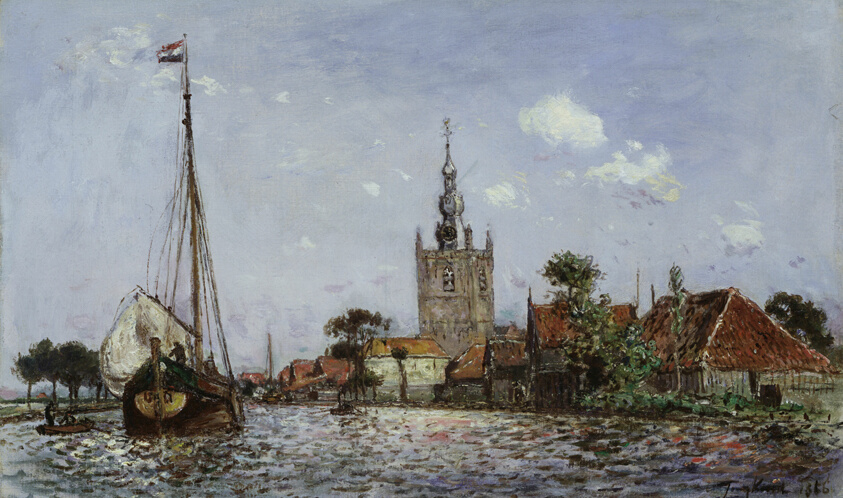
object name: Painting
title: The Church of Overschie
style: Impressionism, 19th century, nineteenth century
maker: Johan Barthold Jongkind (Dutch, 1819-1891)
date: 1866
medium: Oil on canvas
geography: Holland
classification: oil on canvas; oil paintings (visual works); paint; dutch; painting; european painting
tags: weather/seasons, blue (color), boatman, boats, building, buildings, church, river, ships, sky, summer, towns, trees, urban life, water, landscapes